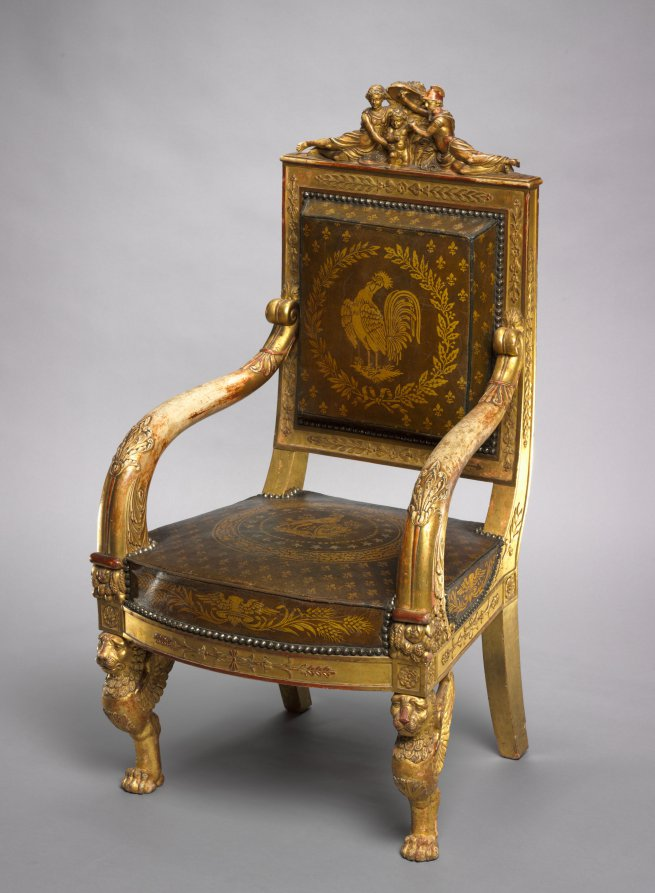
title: Child's Throne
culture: France, Paris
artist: Pierre-Marie Balny le Jeune (French, 1832)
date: 1822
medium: carved and gilded wood, leather upholstery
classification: Furniture and woodwork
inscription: inscribed with stencils inside back rail: BLONDEL TAPISSIER/RUE ST. ANTOINE N 72 1822 inscribed in ink lower edge back rail: 12 JANVIER 18[22?]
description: This chair was made for the young, presumed successor to the French throne who ruled briefly as Henri V in 1830, the last of the direct Bourbon line. He is depicted at the center of the top rail protected by female figures representing France and Minerva, the Roman goddess of wisdom. Fleurs-de-lis and the Gallic rooster, symbols of French royalty and the French people, decorate the upholstery.